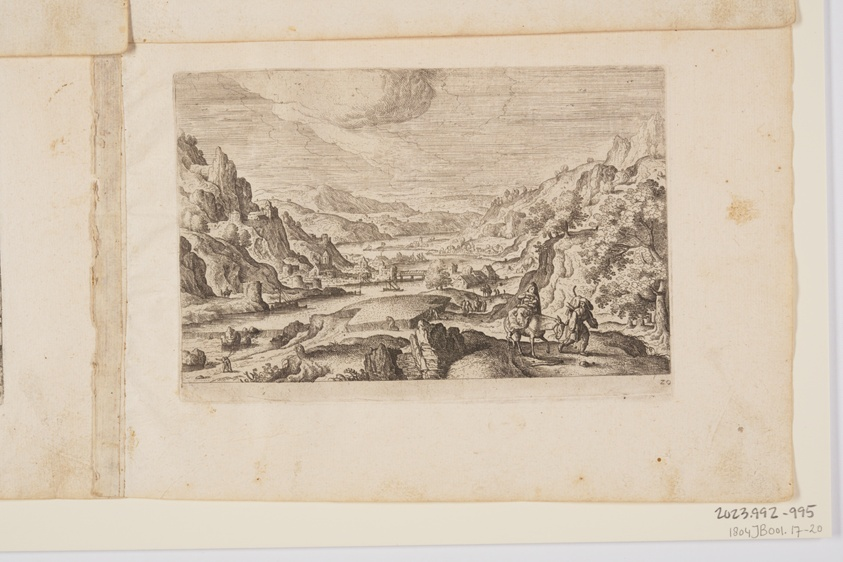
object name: Print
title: Plate 20, from Landscapes with Scenes from the Old and New Testament and Ovid’s Metamorphoses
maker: Hans Bol (Flemish, 1534–1593); published by Philip Galle (Flemish, 1537–1612)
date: 1574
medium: Etching on ivory laid paper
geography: Flanders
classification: print; paper; prints and drawing; etching